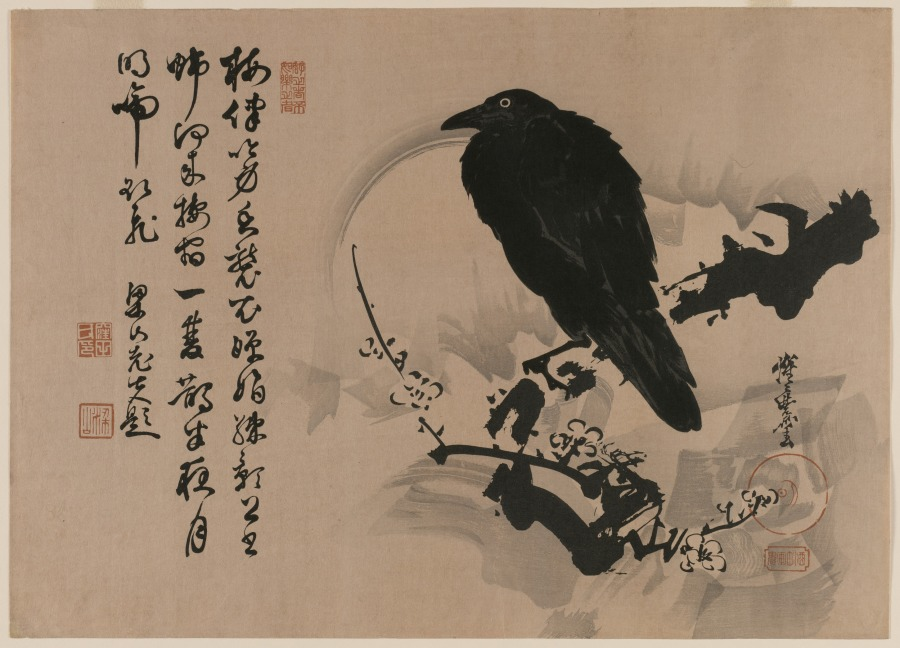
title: Full Moon with Crow on Plum Branch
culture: Japan, Edo period (1615–1868)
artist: Kawanabe Kyōsai (Japanese, 1831–1889)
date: 1880s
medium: color woodblock print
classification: Print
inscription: Signature: Shojo Kyosai ga Artist Seal: Meigetsu (full moon), Shuchu gaki (painting demon in the midst of drink)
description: The accompanying poem may be translated as: The plum accompanies their squawking forms; Its fragrance assaults their feathers. Beautiful shadows of the branches in the moonlight Climb toward the study curtain. The pair of crows that have lodged in my house Cry and make to fly a way, Under the bright moon in the depths of the night.